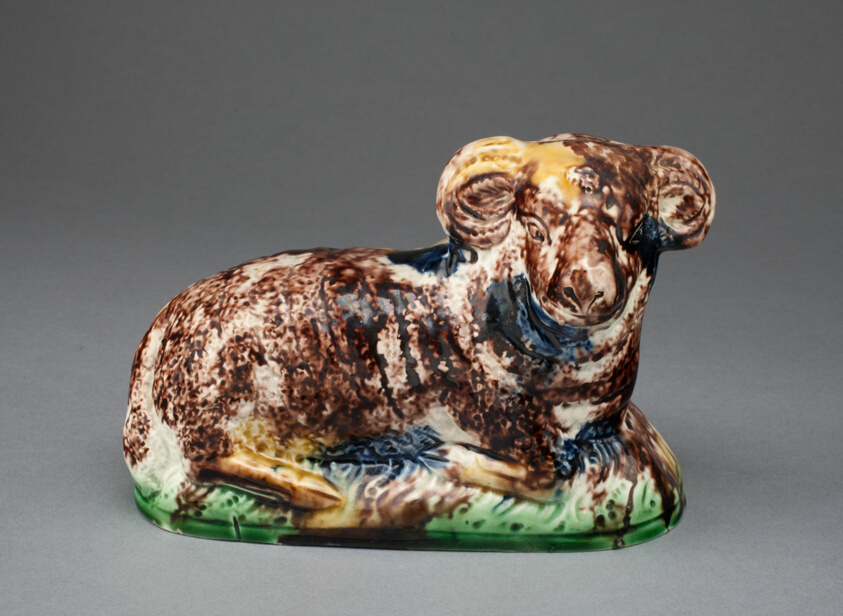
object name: Ceramics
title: Ram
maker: Staffordshire, England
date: c. 1780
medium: Lead-glazed earthenware (creamware)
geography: Staffordshire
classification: earthenware; creamware; ceramics; european decorative arts; lead-glazed earthenware